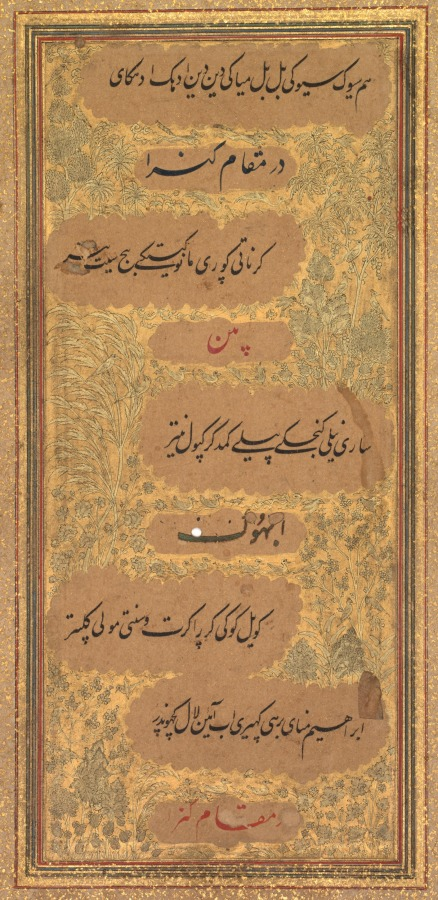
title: From Dohras (Songs) 40 and 36 from the Kitab-i Nauras of Sultan Ibrahim Adil Shah II (verso)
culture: India, Bijapur, Deccan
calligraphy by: Khalilullah Butshikan (Persian, active in India 1596–c. 1620)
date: 1618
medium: ink with two-tone gold on paper, double-sided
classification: Painting